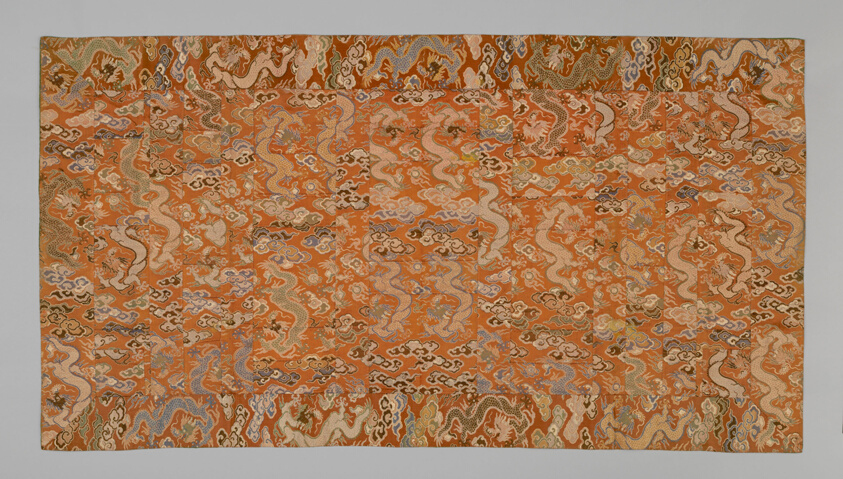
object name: Textile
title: Kesa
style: edo (japanese period), Japanism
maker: Japan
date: Edo period (1615–1868), late 18th century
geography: Japan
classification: textile; costume; liturgical - buddhist; weaving